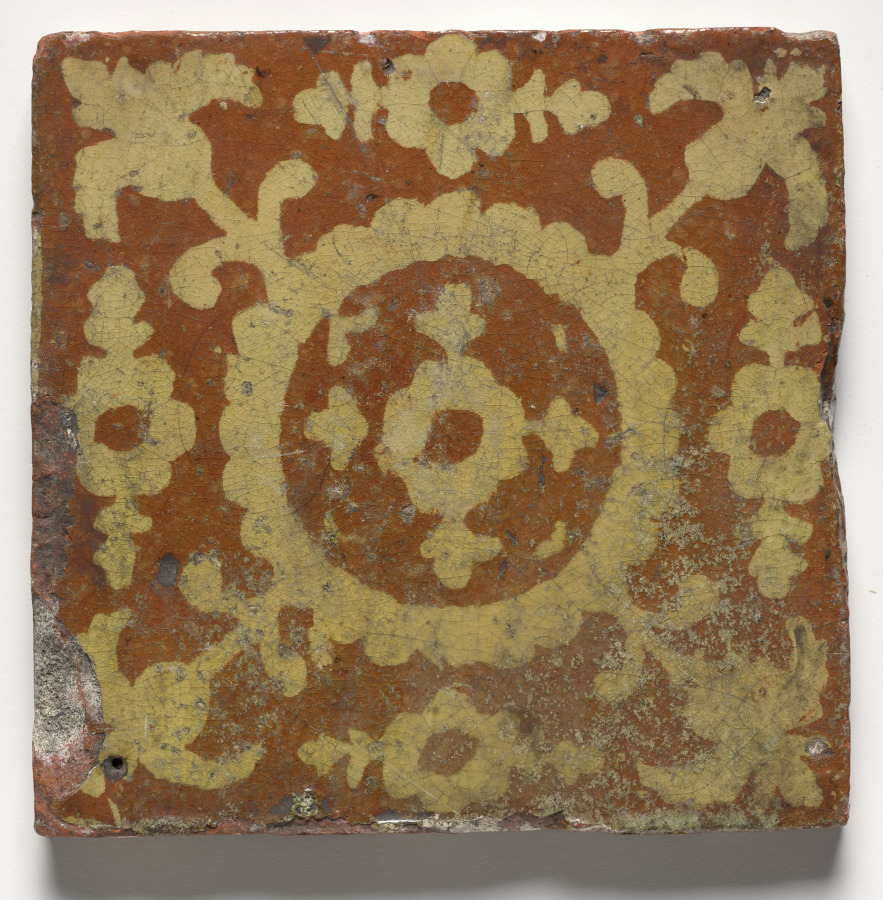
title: Tile- Brown with Yellow Central Motif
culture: Netherlands, Holland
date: c. 1500s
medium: glazed ceramic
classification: Ceramic